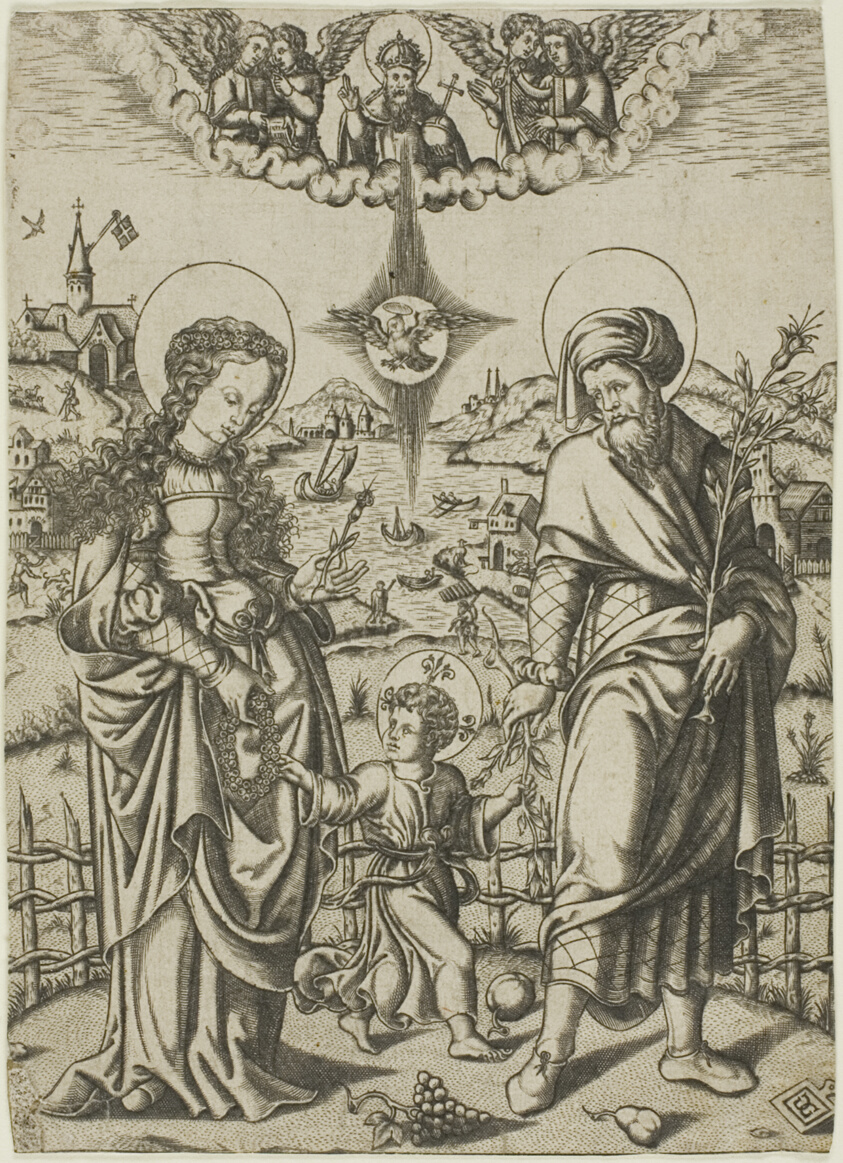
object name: Print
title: Holy Family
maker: Monogrammist GG; Netherlandish, early 16th century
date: c. 1510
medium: Engraving on paper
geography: Flanders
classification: engraving; print; prints and drawing